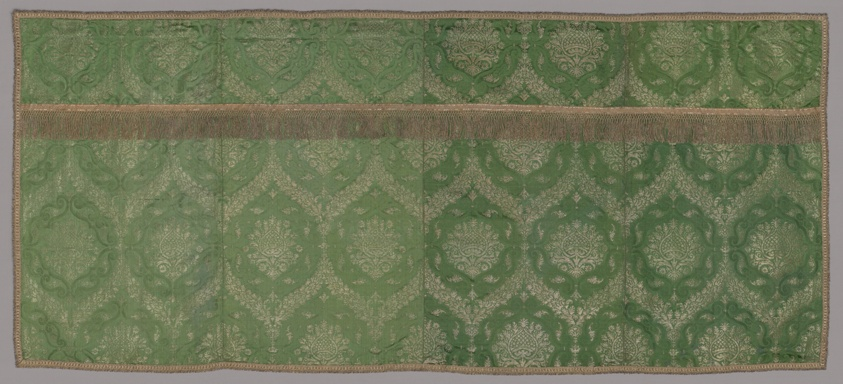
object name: Religious/Ritual Object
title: Altar Frontal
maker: Italy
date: Second half of 16th century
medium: Silk and gilt-metal-strip-wrapped silk, 4:1 satin damask weave with supplementary brocading wefts bound by main warps in weft-float faced 1:4 's' interlacing; edged with gilt-metal-strip-wrapped silk, plain weave with supplementary patterning warps and extended ground weft uncut fringe and silk, gilt-metal-strip and gilt-metal-strip-wrapped silk, stripes of plain weave with supplementary patterning warps and of 2:2 'z' twill weave with extended ground weft, wrapped, knotted uncut fringe; lining: silk, plain weave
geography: Italy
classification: textile; weaving; ritual objects; liturgical